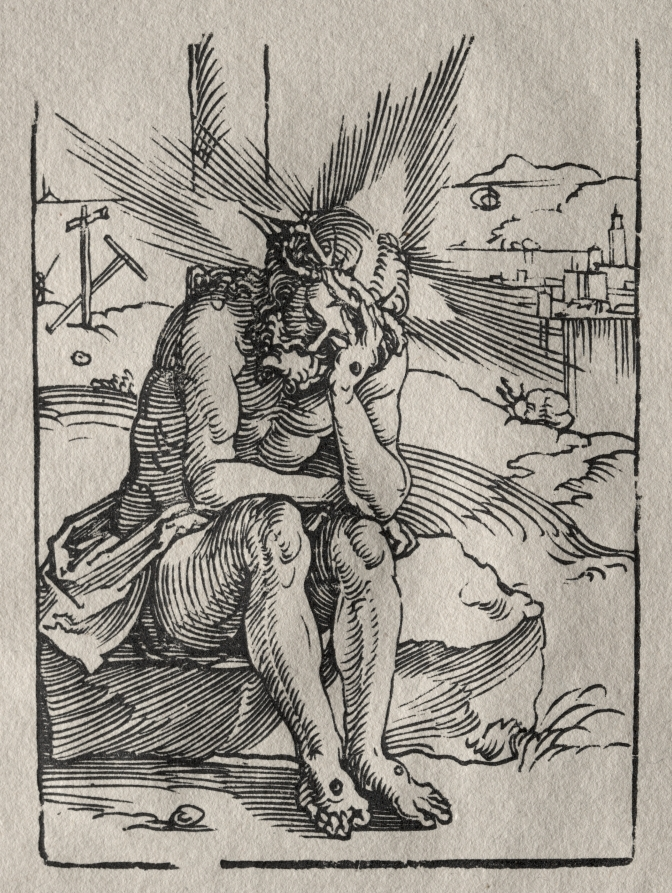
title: The Man of Sorrows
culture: Germany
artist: Hans Sebald Beham (German, 1500–1550)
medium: woodcut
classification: Print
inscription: Stamped on verso: "Sammlung/Derschau/1922"